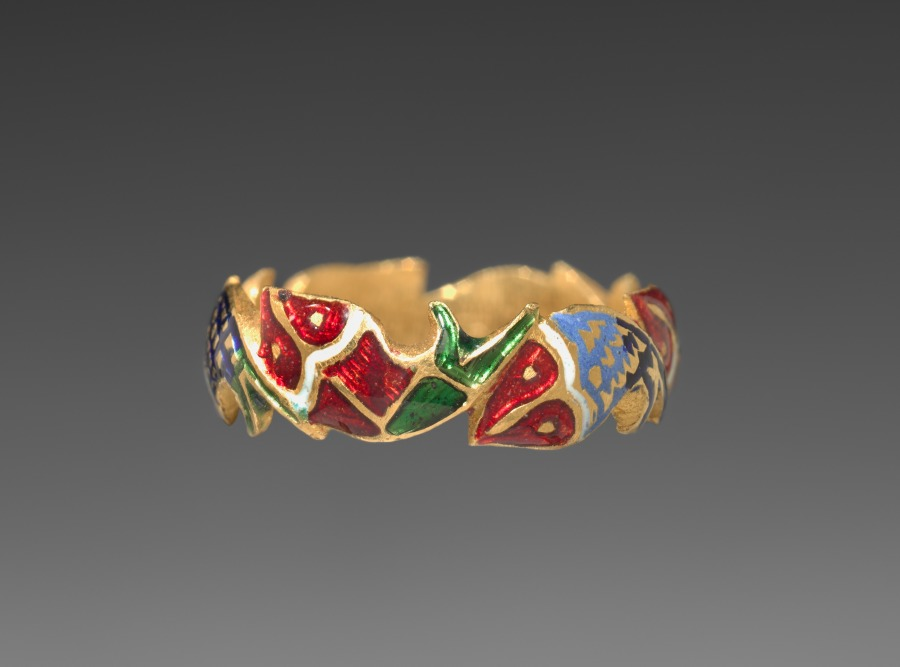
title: Ring in the Form of Six Fishes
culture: India, Jaipur, 18th century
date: 1700s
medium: gold, enamel and gems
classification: Jewelry